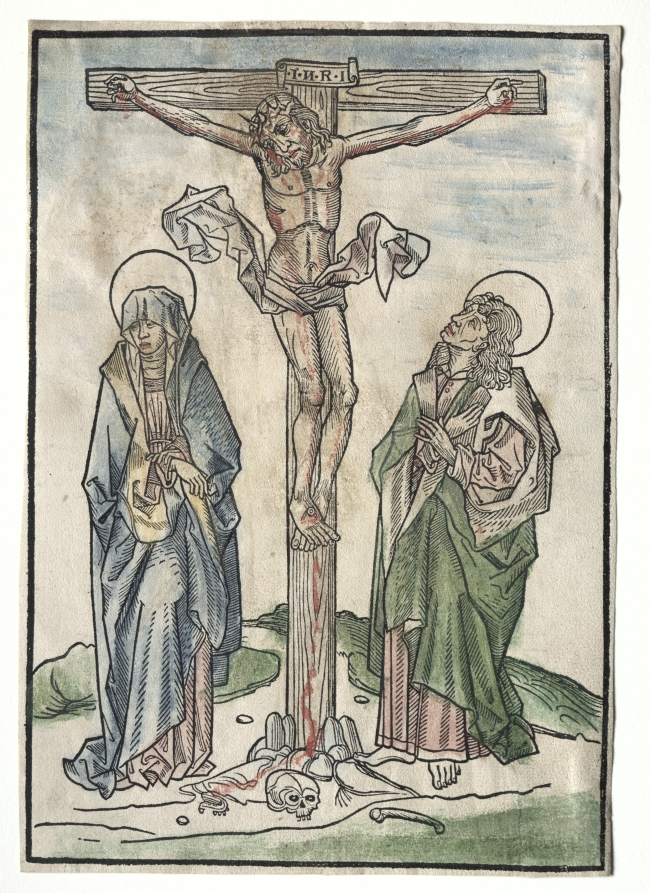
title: Christ on the Cross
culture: Germany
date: 1400s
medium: woodcut with watercolor added by hand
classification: Print